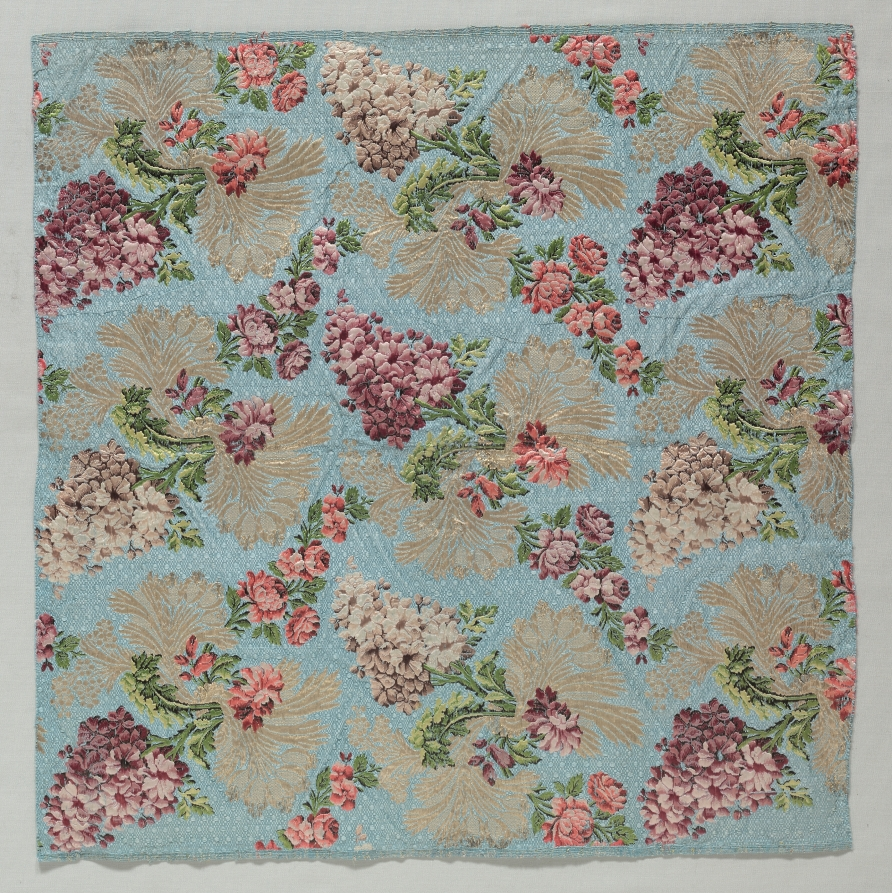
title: Brocade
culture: France, 18th century, period of Louis XV (1723-1774)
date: 1723–1774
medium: lampas weave, brocaded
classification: Textile